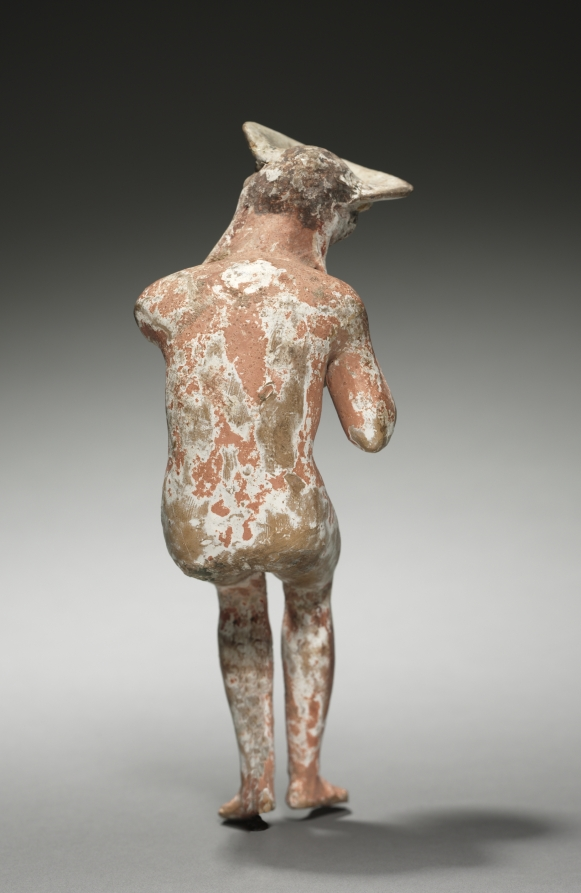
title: Seated Man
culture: Greece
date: 400–300 BCE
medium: painted terracotta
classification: Sculpture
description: This statuette takes the form of a seated male figure, nude but for a large headdress or hat with a yellow and red–striped ribbon beneath it. The ends of the ribbon trail down over each shoulder. In his right hand he holds a pitcher, and his left arm is missing below the shoulder. His entire body is painted a pinkish red over a white slip.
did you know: The pitcher in the figure’s hand, called an oinochoe, was used in ancient Greece to pour wine.